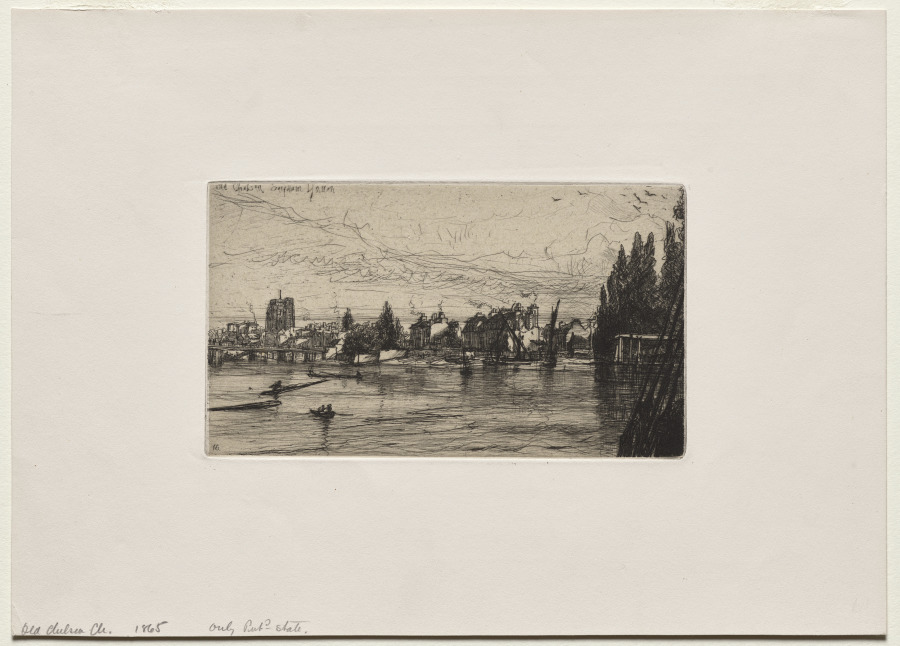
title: Old Chelsea Church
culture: England, 19th century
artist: Francis Seymour Haden (British, 1818–1910)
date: 1865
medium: etching and drypoint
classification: Print